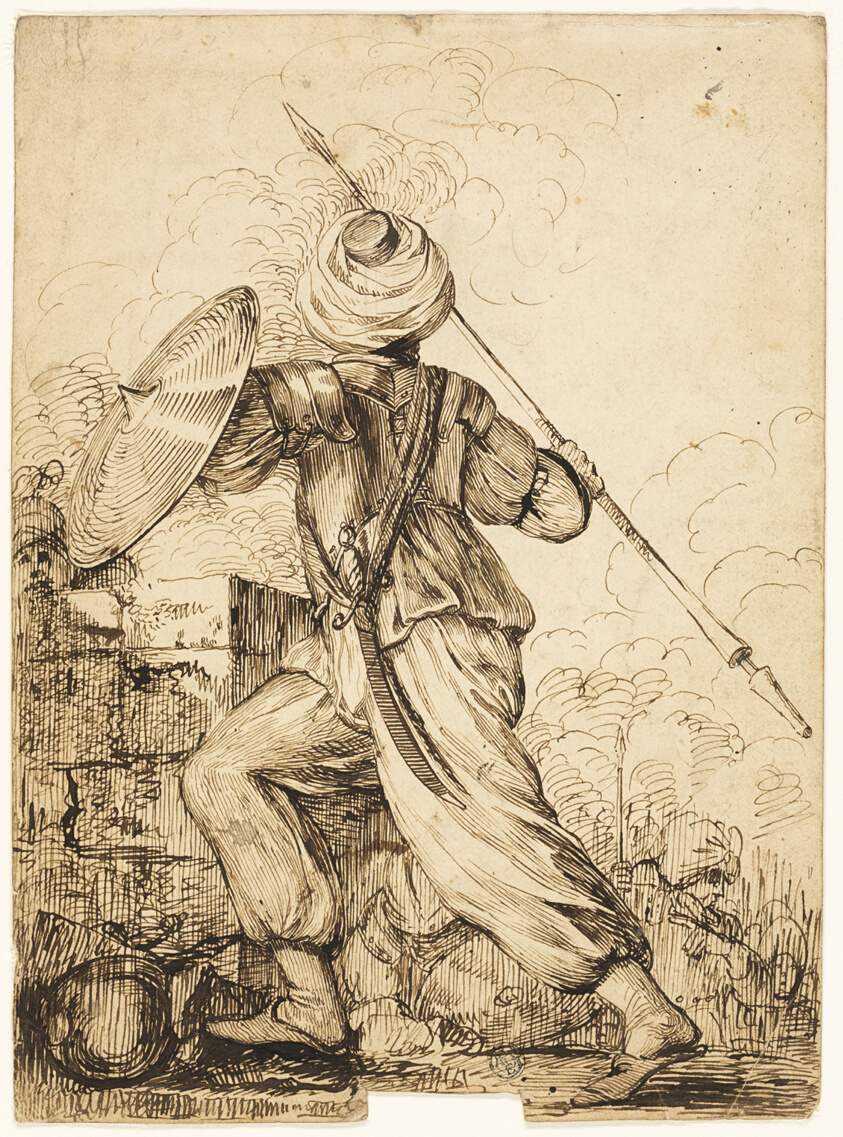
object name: Drawing and Watercolor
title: A Turkish Soldier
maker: Attributed to James Durno (English, c. 1745-1795); or John Hamilton Mortimer (English, 1740-1779)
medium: Pen and brown ink on cream wove paper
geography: England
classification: pen and ink drawings; drawings (visual works); prints and drawing